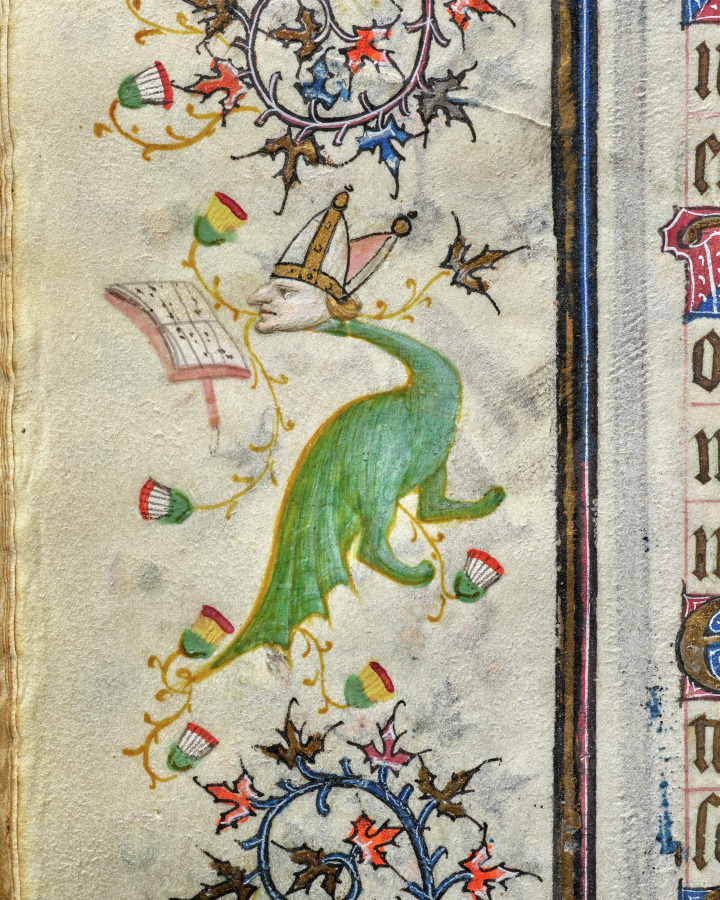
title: Hours of Charles the Noble, King of Navarre (1361-1425): fol. 188v, Text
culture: France, Paris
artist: Master of the Brussels Initials and Associates (French)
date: c. 1405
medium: ink, tempera, and gold on vellum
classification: Bound Volume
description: This precious volume was obviously highly prized by its owner, the French-born King of Navarre, who had his coat of arms painted on no less than twenty folios. Rather than directly commissioning this manuscript from a specific workshop, it seems that Charles the Noble acquired his book of hours -- perhaps ready-made for the luxury market -- while on a trip to Paris in 1404-05. A collaborative effort, six painting styles are evidenced within the pages of this codex, those of two Italians, two Frenchmen, and two Netherlanders. The painter who was responsible for the planning and decoration of the book, and who produced seventeen of the large miniatures, was a Bolognese artist known as the Master of the Brussels Initials. His principal assistant, responsible for most of the borders, was a Florentine who signed his name "Zecho" da Firenze on folio 208 verso.